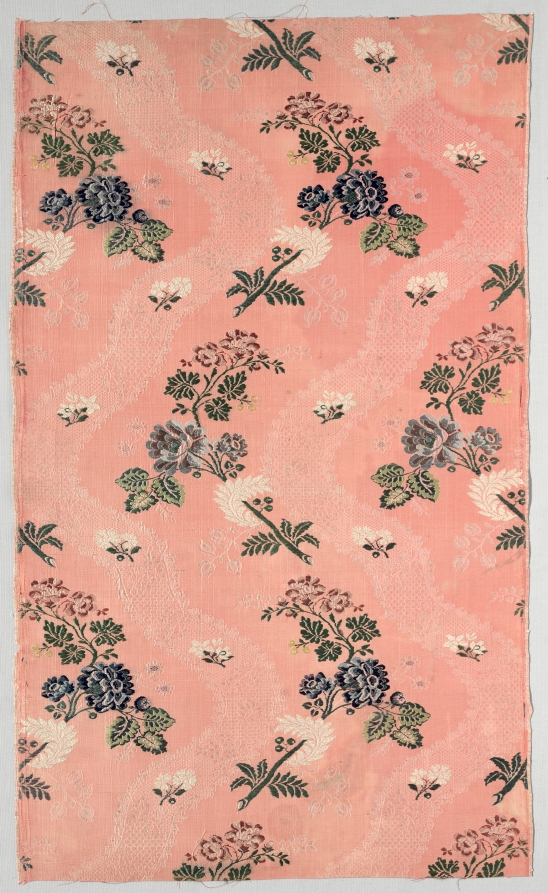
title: Length of Textile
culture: France, 18th century, Period of Louis XV (1723-1774)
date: 1723–1774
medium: brocade, silk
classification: Textile